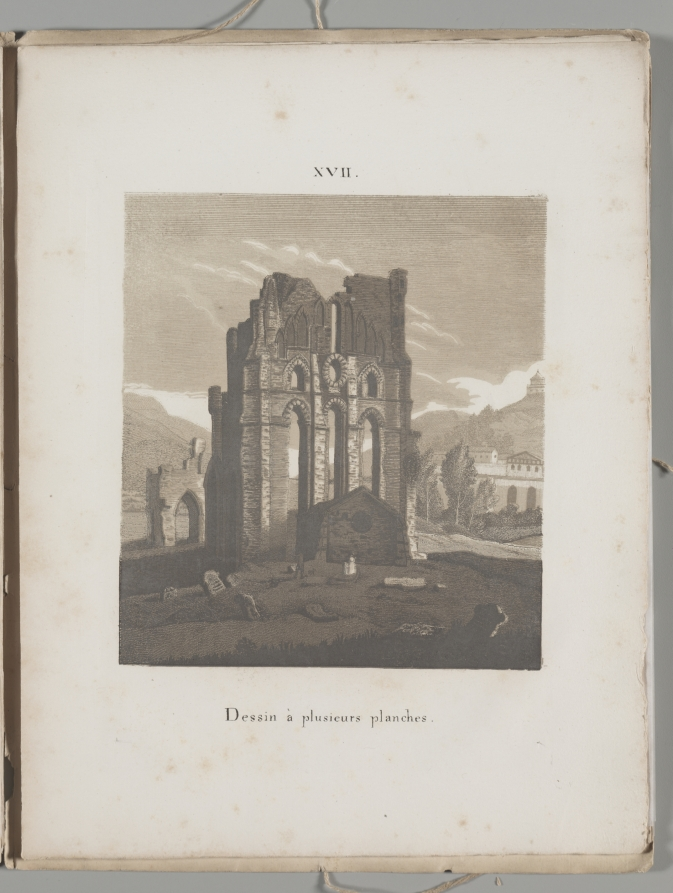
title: Art of the Lithograph: Italian Church Ruin, Plate XVII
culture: Germany, 19th century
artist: Alois Senefelder (German, 1771–1834)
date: 1819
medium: lithograph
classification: Portfolio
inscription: On plate: lower center: Dessin a plusieurs planches press; upper center: XVIII